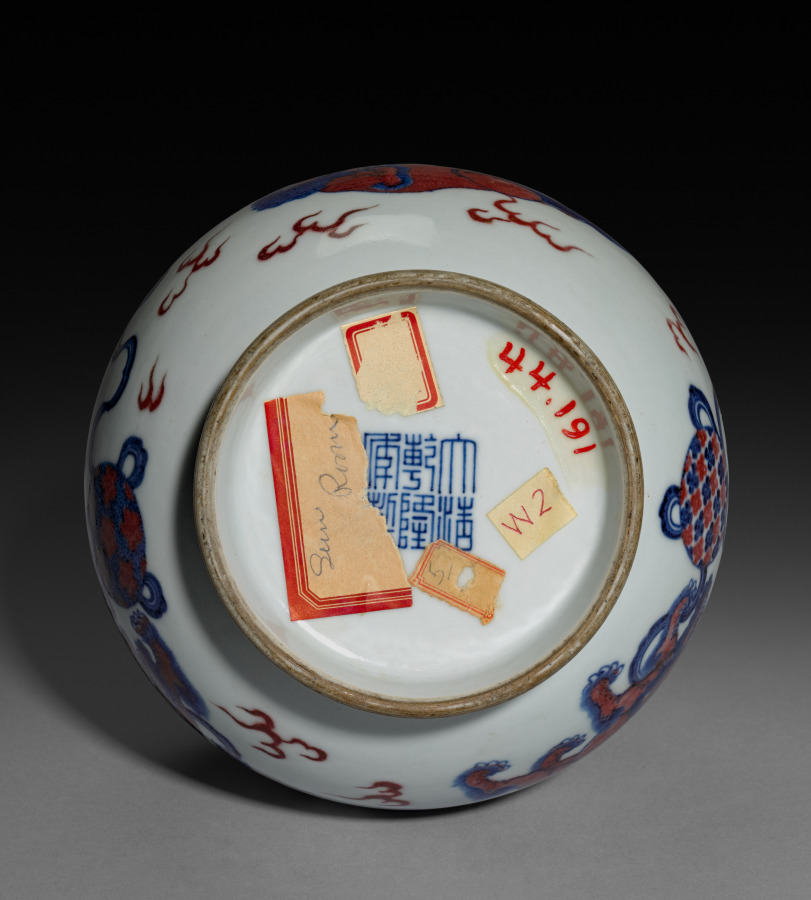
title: Bottle-shaped Vase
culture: China, Qing dynasty (1644–1911), Qianlong reign (1736–95)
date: 1736–95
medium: porcelain with underglaze decoration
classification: Ceramic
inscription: 大清乾隆年制